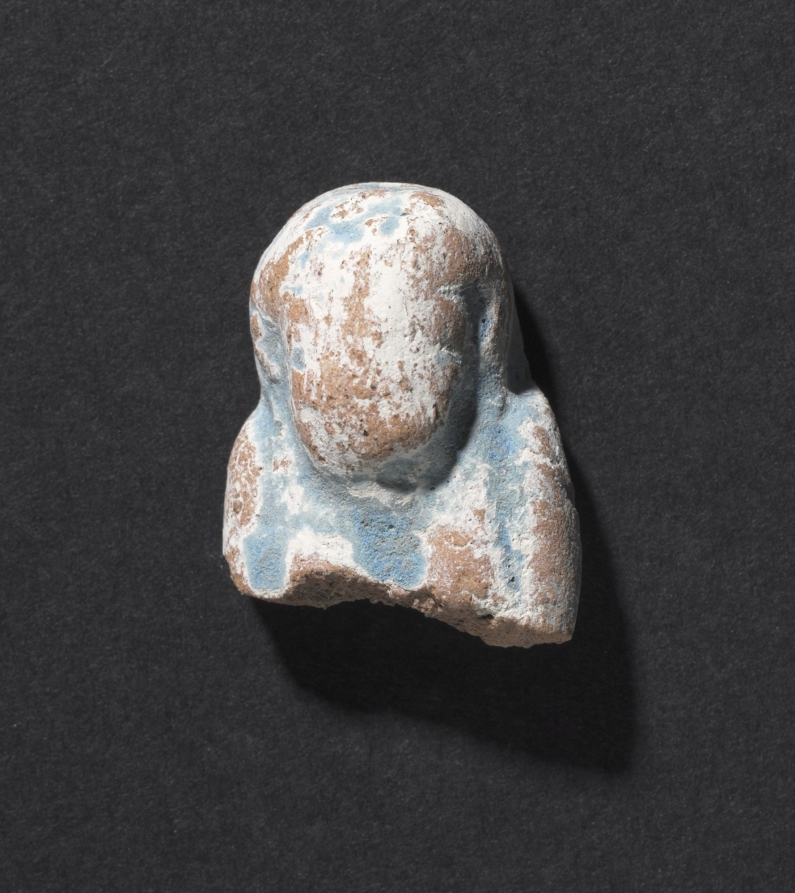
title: Shawabty of Ditamenpaankh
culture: Egypt, Late period (715–332 BCE), Dynasty 25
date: 715–656 BCE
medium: terracotta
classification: Funerary Equipment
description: High demand for shawabtys in the Late Period, a time when as many as 400 or more shawabtys were placed in the tomb with the deceased, gave rise to a specialized container for storing them: the shawabty box. This example is inscribed for the lady of the house, Ditamenpaankh, and was probably one of a pair originally made for her. The single-masted boat on the box's lid is perhaps an allusion to the pilgrimage of the deceased to the holy city of Abydos, the cult city of Osiris, king of the dead. The shawabtys inside are crude, mass-produced examples cast in an open mold. Made of terracotta, their blue paint imitates more costly shawabtys made of faience. As for the shawabty spell, it has been removed from its traditional location on the shawabty's front and relocated onto the sides of box, where it needed only to be written once, thus expediting production.